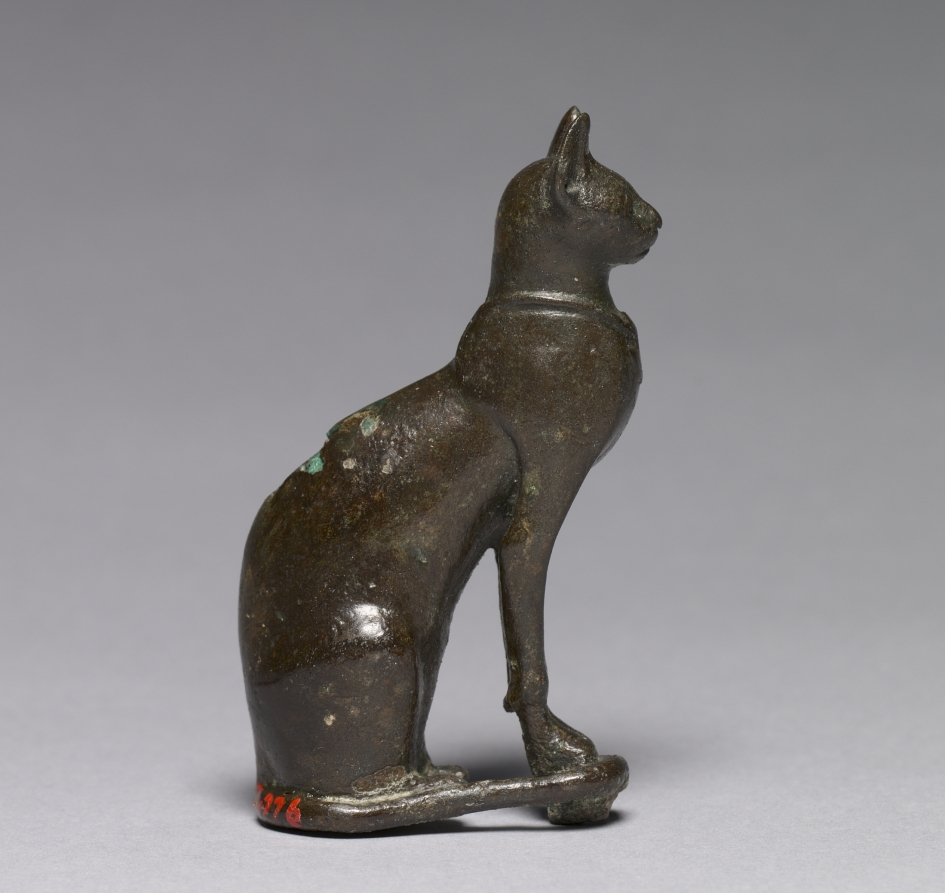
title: Cat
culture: Egypt, Late period (715–332 BCE), Dynasty 26 or later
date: 664–30 BCE OR 664–330 BCE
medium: bronze and gold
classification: Sculpture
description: Cats were the sacred animal of Bastet, Egyptian goddess of fire, cats, and protector of the home. Sitting upright in a pose characteristic of these feline figurines, this bronze cat adorned with an embossed pendant and gold earring was made as a votive offering to be deposited with the deceased.